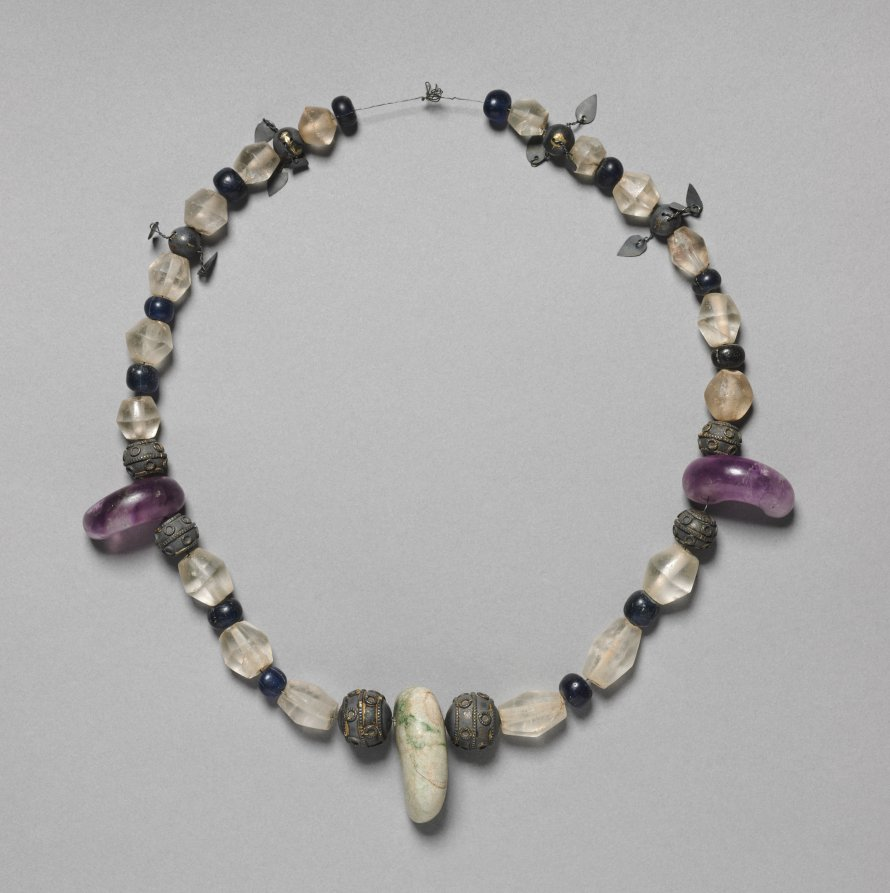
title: Necklace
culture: Korea, Unified Silla period (676-935)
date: 700s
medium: jade, amethyst, gold, rock crystal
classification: Jewelry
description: An enormous amount of beaded strings and necklaces were excavated from Silla tomb sites. Glass, largely produced in ancient Rome since the late first century CE, also reached the Korean peninsula through the Silk Road, the ancient global trade route. Yet soda glass started to be produced in the Silla territory as early as the second century CE. Comprising glass beads, comma-shaped jades, and silver bands, this is an excellent example of a necklace.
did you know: Glass, largely produced in ancient Rome since the late first century CE, also reached the Korean peninsula through the Silk Road, the ancient global trade route.